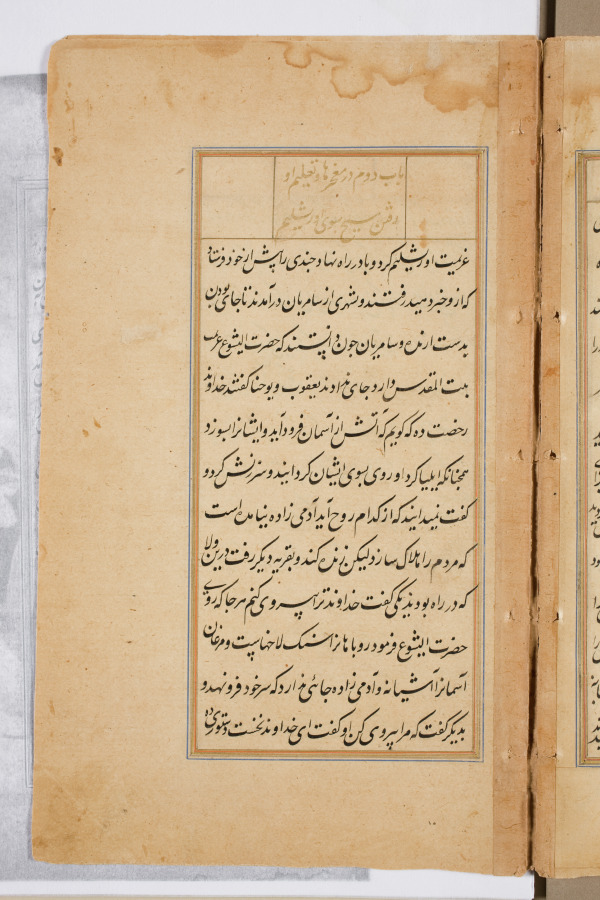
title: Text page from a Mirror of Holiness (Mir’at al-quds) of Father Jerome Xavier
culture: Mughal India, Allahabad, made for Prince Salim (1569–1627)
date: 1602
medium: Ink and gold on paper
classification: Manuscript